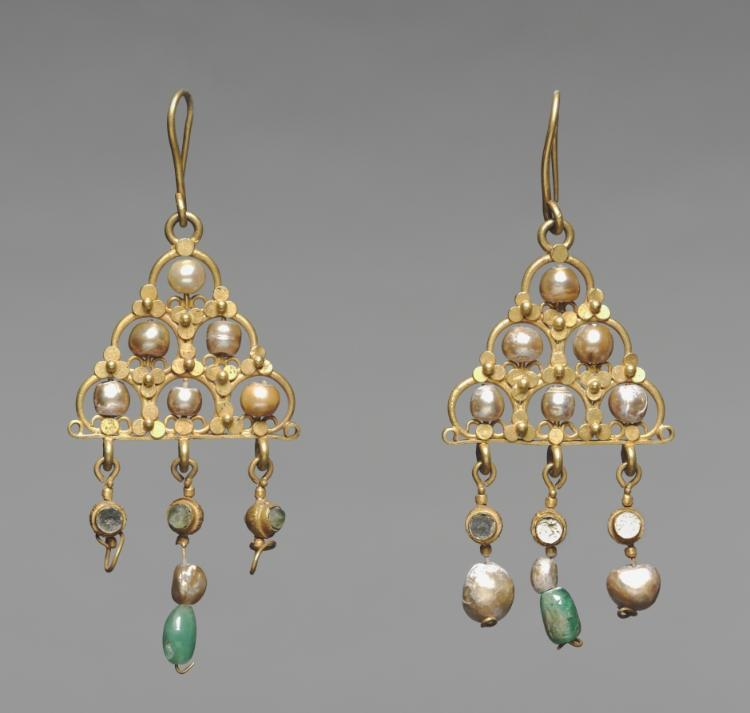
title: Earring (one of a pair)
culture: Byzantium, early Byzantine period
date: 600s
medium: gold, pearls, glass, and emeralds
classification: Jewelry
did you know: This piece of jewelry was worn by a woman in the fashionable courts of Byzantium. Decorated with pearls, glass, and emeralds, these gold earrings are delicate, yet eye-catching. Do you think these chandelier-style earrings would be fashionable today?